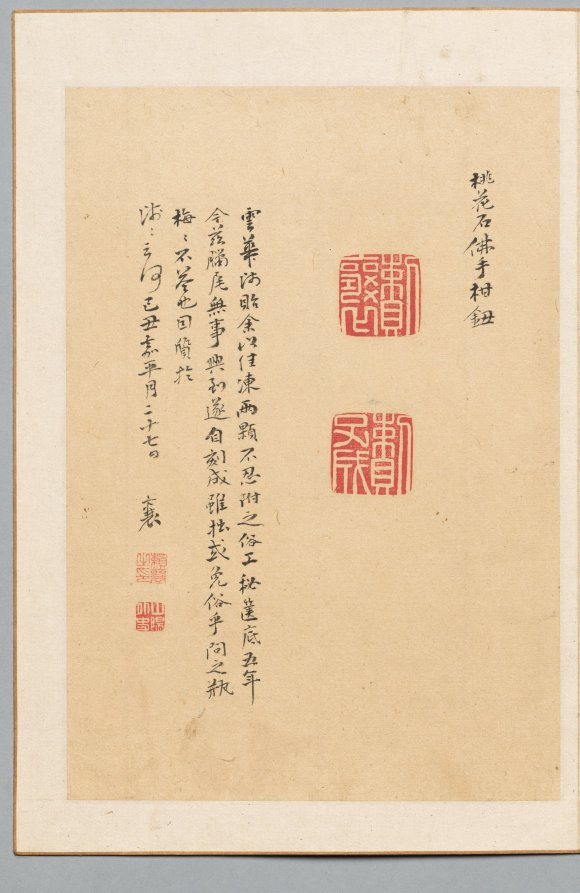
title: Inscription and Two Seals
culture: Japan, Edo period (1615–1868)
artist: Rai Sanyō (Japanese, 1780–1832)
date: 1829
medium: leaf from a pair of folding albums; ink on paper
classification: Portfolio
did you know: Rai Sanyō, author of a major history of Japan, died from tuberculosis while writing at his desk. A decidedly not fun fact.